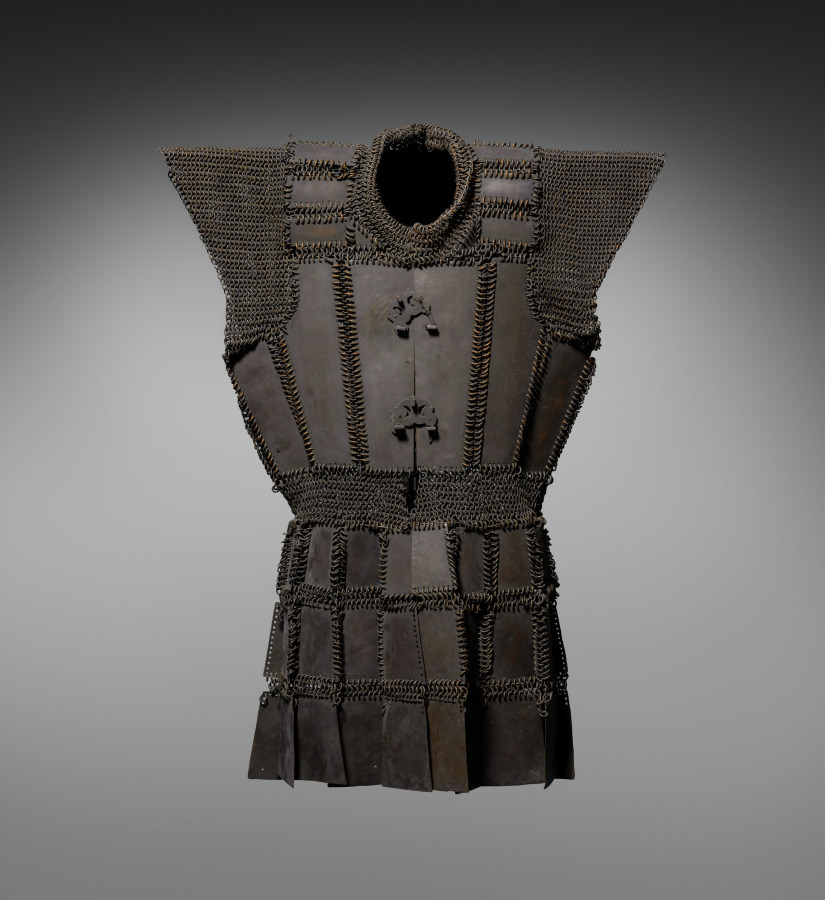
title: Maranao brass corselet (kurab-a-kulang)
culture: Philippines, Mindanao, Lake Lanao, Bacolod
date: 1800s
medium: Brass plates and chain mail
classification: Arms and Armor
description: This corselet—armor worn to protect the torso—has broad, flaring shoulders, a circular neckline, and a skirt-like extension that protected the wearer’s upper thighs. Armor of this type was worn in the Philippines following colonization by Spain. Its brass plates are connected by interlinked rings. The decorative toggles on the front take the form of stylized flowers, typical of the Maranao people native to Lake Lanao on the island of Mindanao.